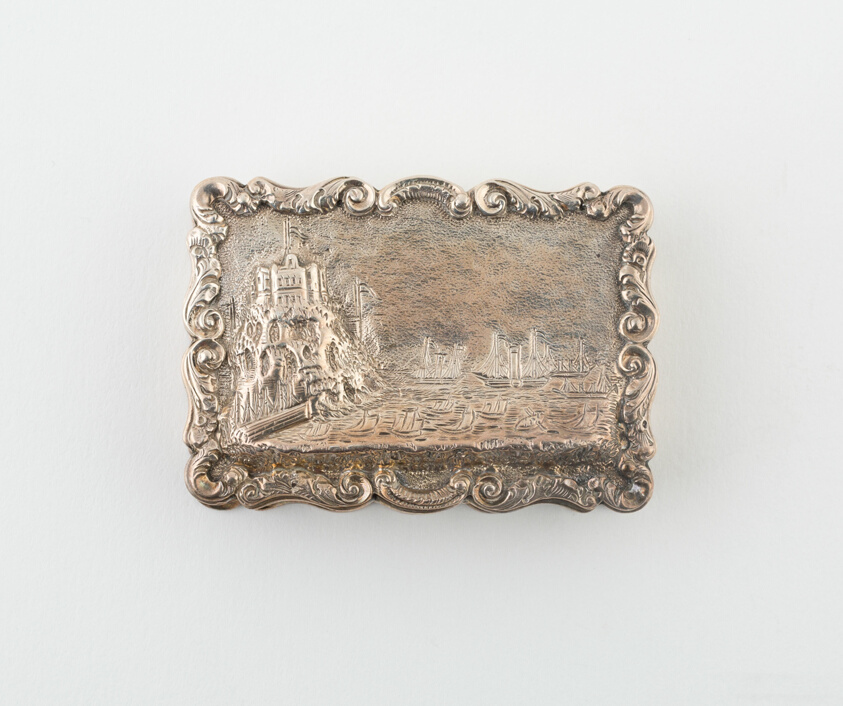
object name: Metalwork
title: Vinaigrette with Harbor Scene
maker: Marked B&S; Birmingham, England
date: 1846/47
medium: Silver and silver gilt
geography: Birmingham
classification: container for personal use; vinaigrette (container for health care); european decorative arts; metalwork; silver; decorative object/ornament